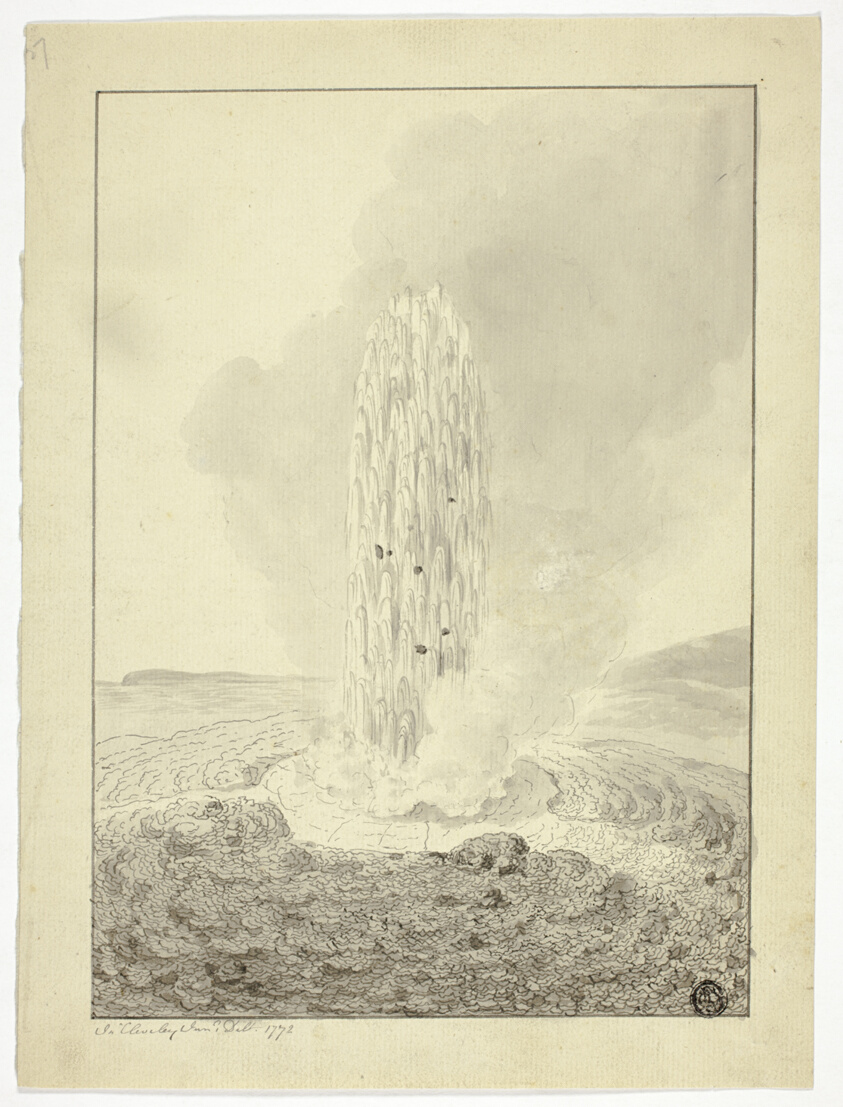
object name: Drawing and Watercolor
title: Geyser, Iceland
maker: John Clevely, II (English, 1747-1786)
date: 1772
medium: Pen and black ink and brush and gray wash over traces of graphite, on cream laid paper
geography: England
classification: ink or chalk wash; drawings (visual works); prints and drawing